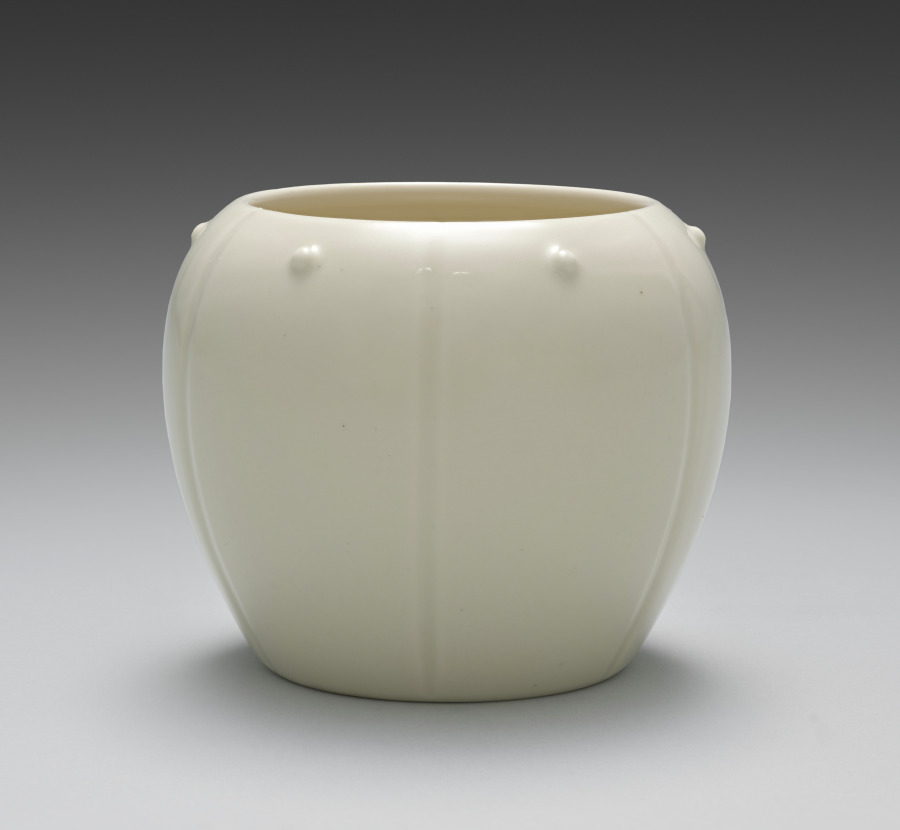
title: Container from Lit Charcoal and Ash Containers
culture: Japan, Meiji period (1868–1912)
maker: Seifū Yohei III (Japanese, 1851–1914)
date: 1893–1914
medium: One from a set of four containers; porcelain with molded design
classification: Ceramic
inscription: 清風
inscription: The storage box for this set is inscribed and impressed with seals.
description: The box lid for these six-lobed lit charcoal and ash containers, or hiire, identifies them as kōhakuji, another of Yohei III’s translucent cream colors over ivory clay bodies. One might translate the name as “lustrous pearl[–glazed ivory] porcelain.” A hiire was filled with ash with burnt coals at the center so that embers and tobacco ash could be discarded safely during a gathering. Each of the lobes on the containers has a round protrusion set below the rim. The studlike pattern is called ruiza. The term is also used to describe the pattern that rings the shoulder of some flower vases or metal kettles used in chanoyu.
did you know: The Seifu studio generally followed the standard practice in Japan for identifying the artist and object in box inscriptions.